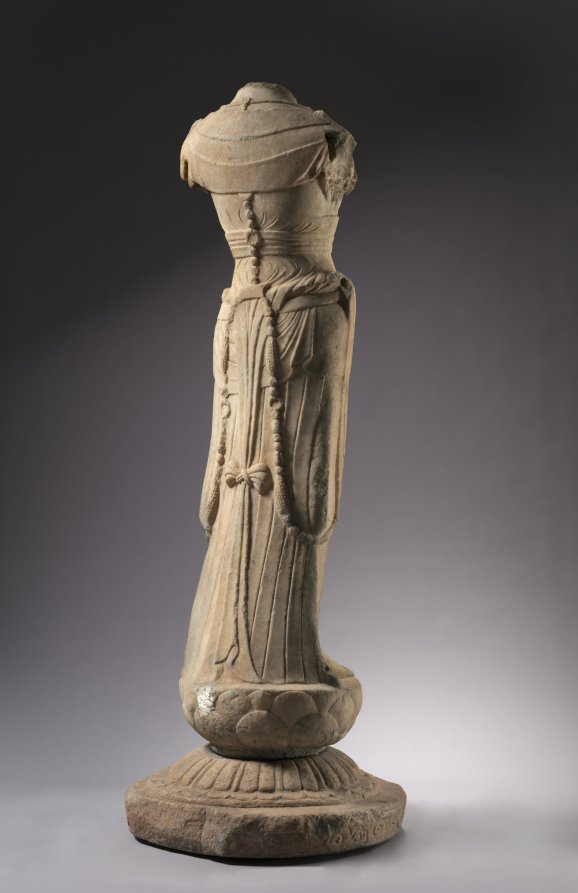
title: Bodhisattva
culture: China, Hebei province, Tang dynasty (618-907)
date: 700s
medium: white marble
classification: Sculpture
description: The bodhisattva is an enlightened being dedicated to the spiritual awakening of all beings. This white marble torso exemplifies the quest for refinement and plasticity of form that mark the golden era of Tang Chinese Buddhist sculpture. The statue was conceived with great power and grandeur. The slight sway of the hip on one side and upraised shoulder on the other result in an elegant S-curve. Emphatic lines cut into the stone create a sense of rhythm and reveal the sculptor’s skill and sureness of execution.